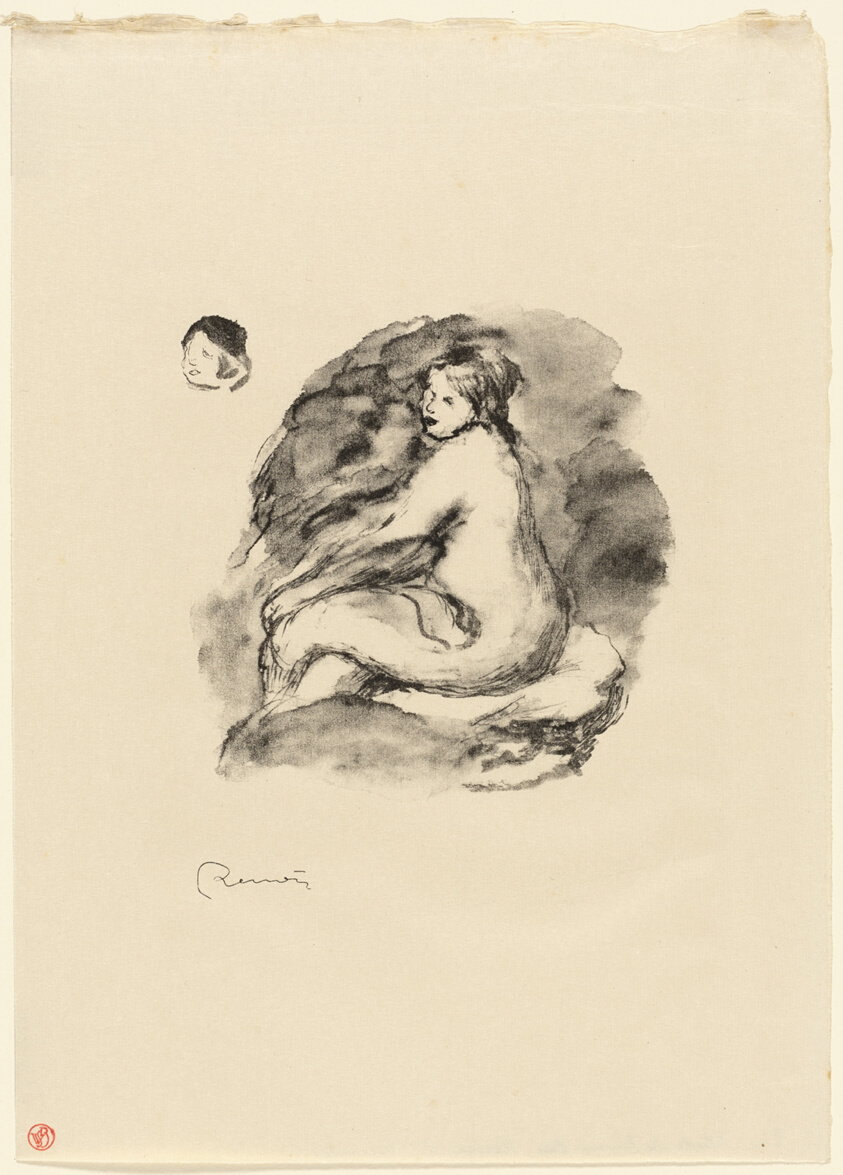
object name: Print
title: Study of Seated Female Nude, Variant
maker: Pierre Auguste Renoir (French, 1841-1919); printed by Auguste Clot (French, 1858-1936); published by Ambroise Vollard (French, 1835-1939)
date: c. 1904, published 1919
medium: Lithograph in black on ivory Japanese paper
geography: France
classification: lithograph; print; prints and drawing